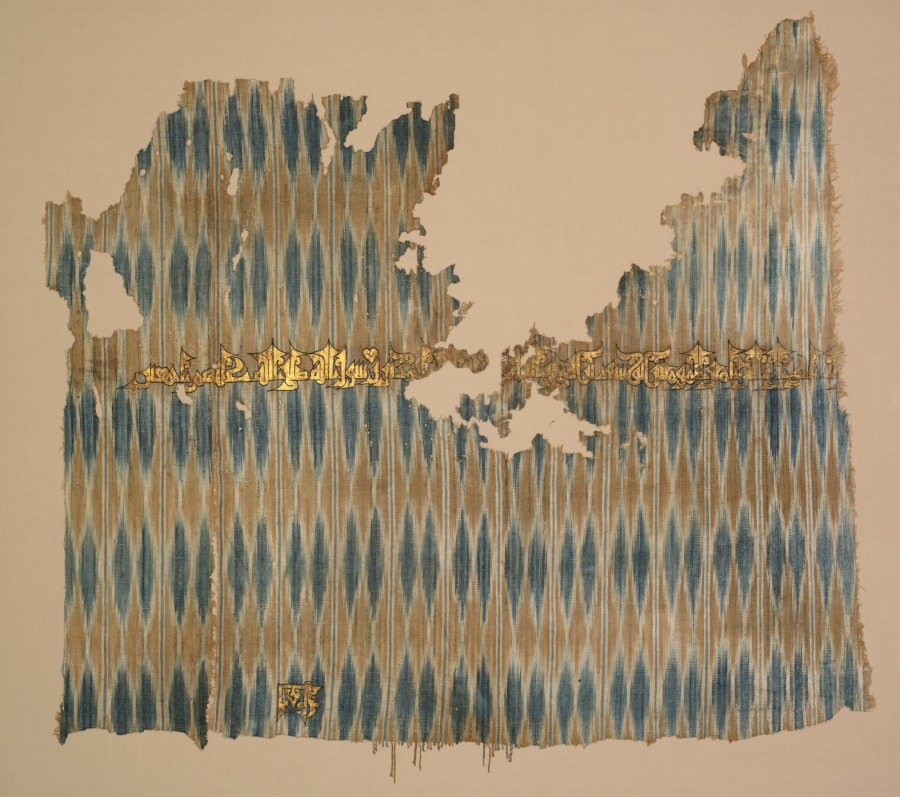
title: Ikat tiraz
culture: Yemen, San'a', Zaydi Imam period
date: 960–80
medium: resist-dyed warp (ikat); plain weave with inscription: cotton and gold leaf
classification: Textile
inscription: Kufic inscription, translated as: ". . . [a]l-Dá'i ilá al-Haqq, Commander of the Believers, Yusuf b. Yahya b. al-Nasir li-Din Allah Ahmad, son of the apostle of God, may God bless them all." At the bottom, the word "to God" is inverted. "Yusuf ibn Yahya" ruled AD 968-998)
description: The "flame" pattern was dyed on the vertical warp threads before weaving began by tightly binding them to resist dye penetration, and repeated for each color. The process and fabric are called ikat, a Malaysian word which may have originated in South Arabia. Yemeni ikats with historical Arabic inscriptions from the 10th century are among the oldest known. This text, written in Kufic script with gold leaf outlined in black, identifies a ruler of the Yemen: ". . . [a]l-Da’i ila al-Haqq, Commander of the Believers, Yusuf b. Yahya b. al-Nasir li-Din Allah Ahmad, son of the apostle of God, may God bless the all." The Arabic phrase "to God" is inverted at the bottom.